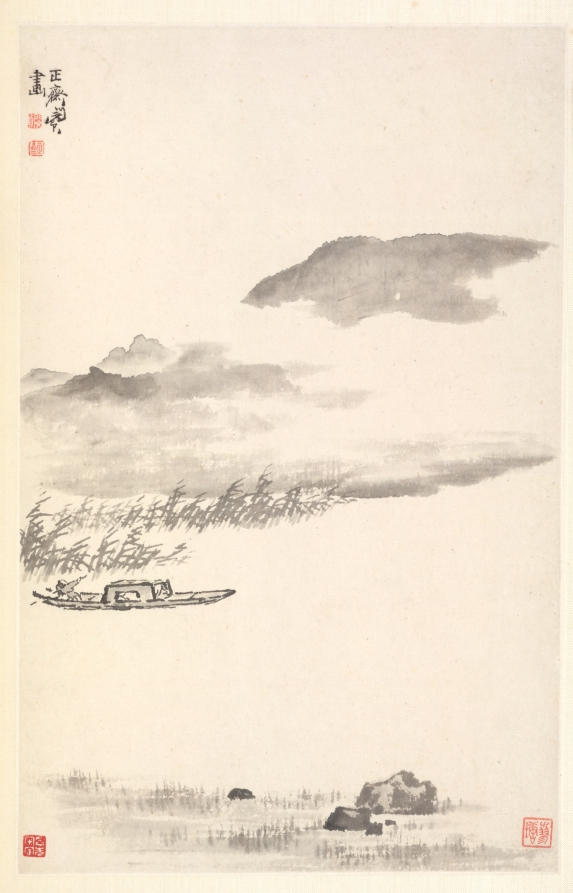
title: River Landscape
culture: China, Qing dynasty (1644-1911)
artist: Min Zhen (Chinese, 1730–after 1788)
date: 1788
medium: album leaf, ink on paper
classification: Painting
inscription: Inscription by Min Chen on the last leaf: I have a habit of collecting strange rocks. My friend Tai-li shan-jen* treasures my paintings as much as I treasure strange rocks. Once we agreed to exchange what we love with each other. However, my busy activities have kept me from carrying this out. This summer I realized that this strange rock has been sitting in my studio for five years, so I painted this to fulfill my old promise. As a record, I chose the grotesque cliff in the last scene of this twelve-leaf album. Cheng-chai, Min Chen inscribed this on the sixth day of the sixth month [July 9] of the wu-shen year [1788]. * Tai-li shan-jen is Wang Li [tzu: Li-fu] tr. Hou-mei Ishida Six seals appearing on the leaves: Min Chen, Cheng-chai, Ching-ch'iao, Chen, Liao-t'ang, Min Chen chih-yin.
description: Min Zhen, who was orphaned at age 12 and developed an eccentric personality, was trained by Tang Yin (1682–1756), a writer, playwright, and superintendent of the imperial porcelain workshops in Jingdezhen. The connection to him may have enabled Min to stay in Beijing for a decade from around 1773. It is not clear whether he ever resided in Yangzhou, but his style is in many instances reminiscent of that of Yangzhou artist Huang Shen. This album demonstrates Min’s versatility and mature style in the last years of his life.